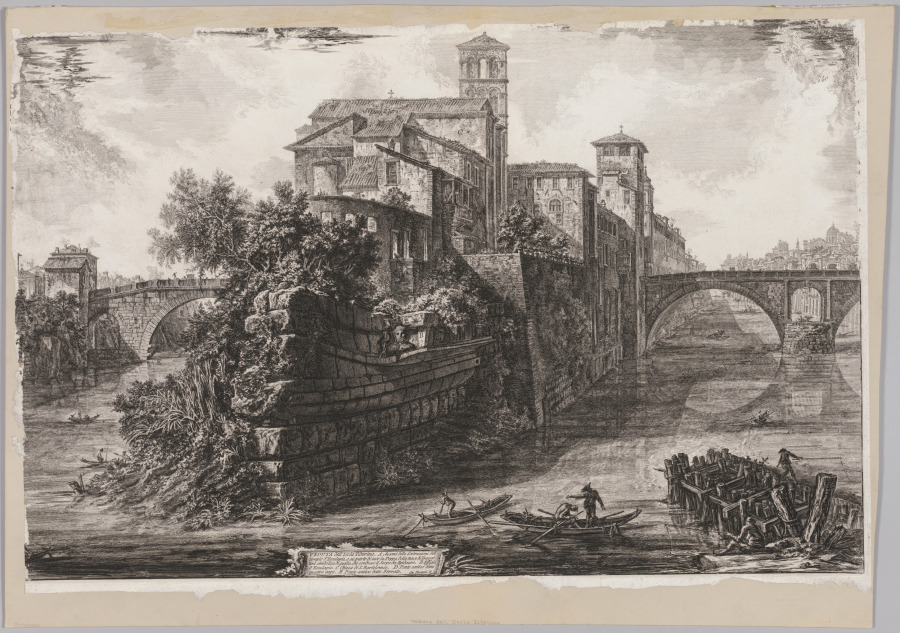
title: Views of Rome: The The Isola Tiberina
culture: Italy, 18th century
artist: Giovanni Battista Piranesi (Italian, 1720–1778)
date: 1775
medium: etching and engraving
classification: Print